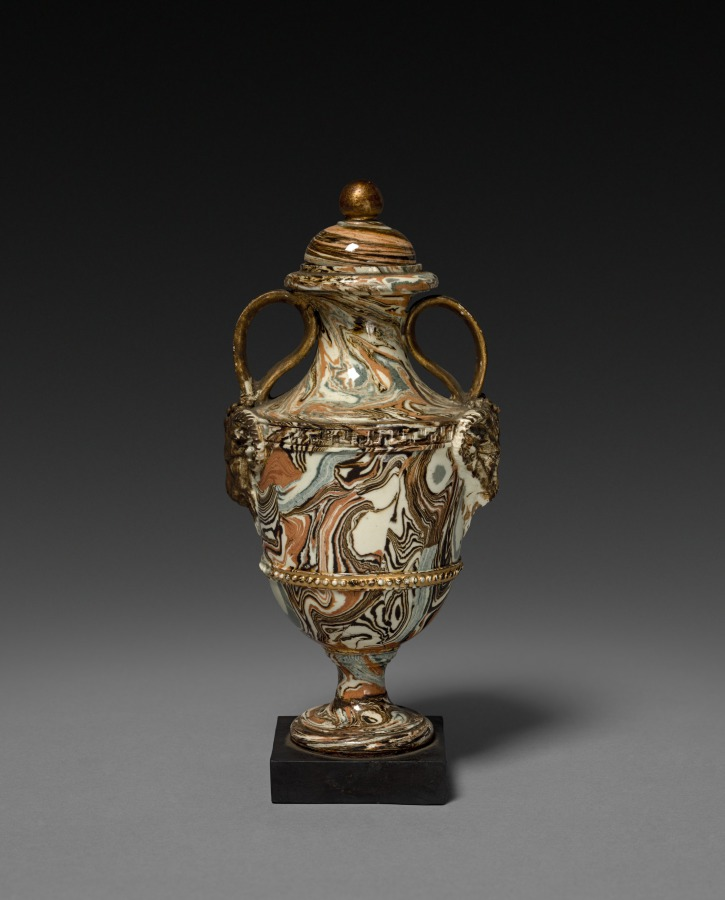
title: Urn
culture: England, late 18th or 19th century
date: late 1700s - 1800s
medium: earthenware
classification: Ceramic